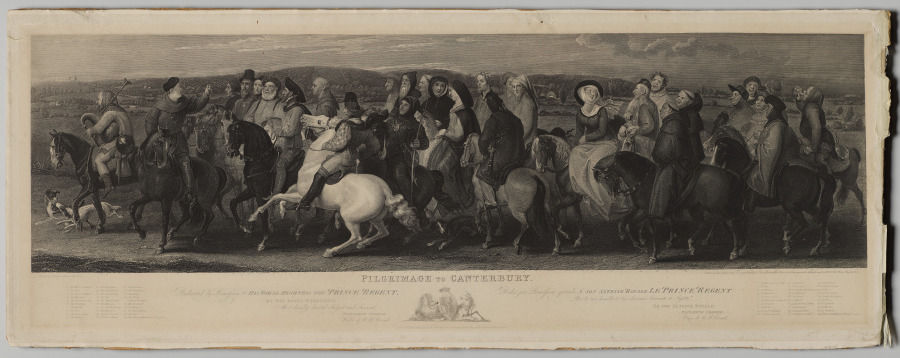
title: Pilgrimage to Canterbury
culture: Italy, 18th century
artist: Luigi Schiavonetti (Italian, 1765–1810)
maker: James Heath (British, 1757–1834)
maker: after Thomas Stothard (British, 1755–1834)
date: 1817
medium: etching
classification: Print